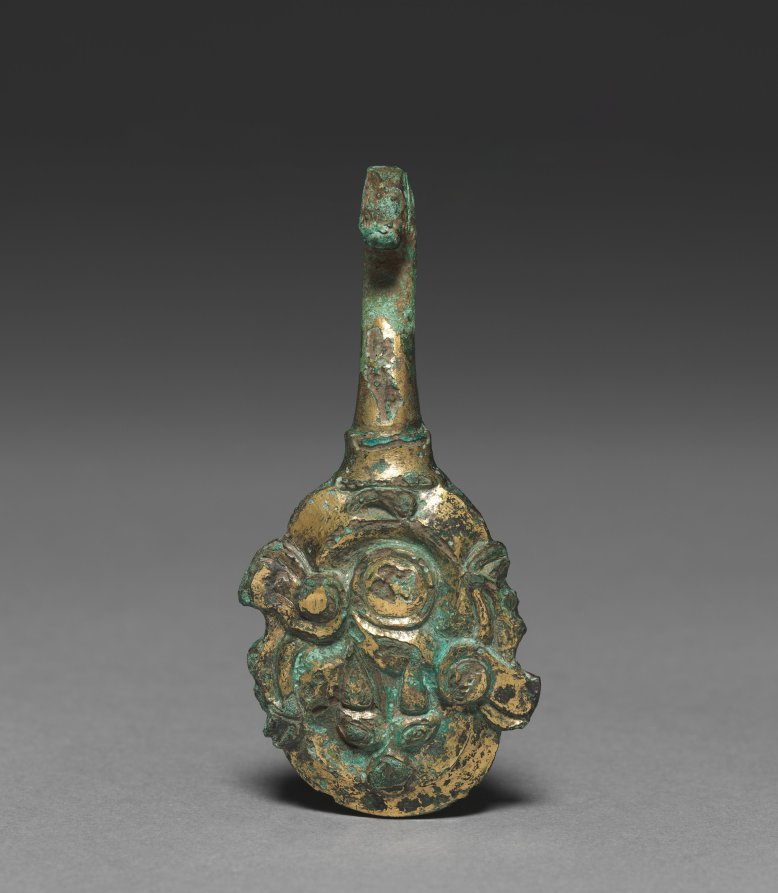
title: Clasp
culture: Korea, Goryeo dynasty (918–1392)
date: 918–1392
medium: bronze gilt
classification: Metalwork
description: Both everyday objects and ornaments such as this belt ornament were standard for Goryeo-period (918-1392) burial goods. Furnishing tombs with an elaborate assemblage of objects was believed to honor and comfort the newly dead. Generally, Goryeo tombs were left untouched until the late 19th century. During the colonial period (1910–45), however, Japanese archaeologists aggressively excavated the tombs located in Kaeseong, the former capital of the Goryeo period. Highly possibly came from one of those excavated tomb sites, this bronze ornament evokes a memory about the colonized Korea (1910-1945).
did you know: The Japanese antique dealer Yamanaka & Company, which opened its branches in New York (1895) and Boston (1899), sold small Korean archaeological materials such as this bronze ornament to American collectors in the early 20th century.